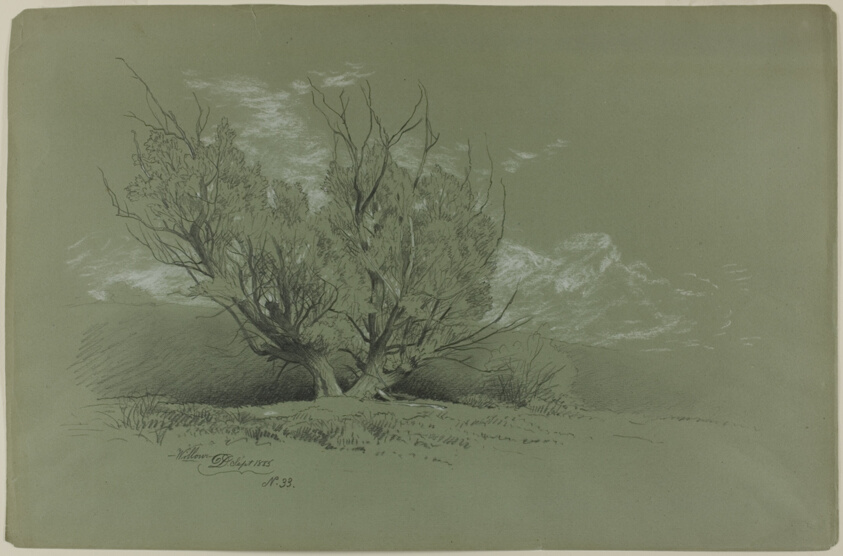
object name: Drawing and Watercolor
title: Willow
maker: David Johnson (American, 1827-1908)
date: 1885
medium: Graphite, heightened with white chalk, on green wove paper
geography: United States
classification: graphite; drawings (visual works); prints and drawing